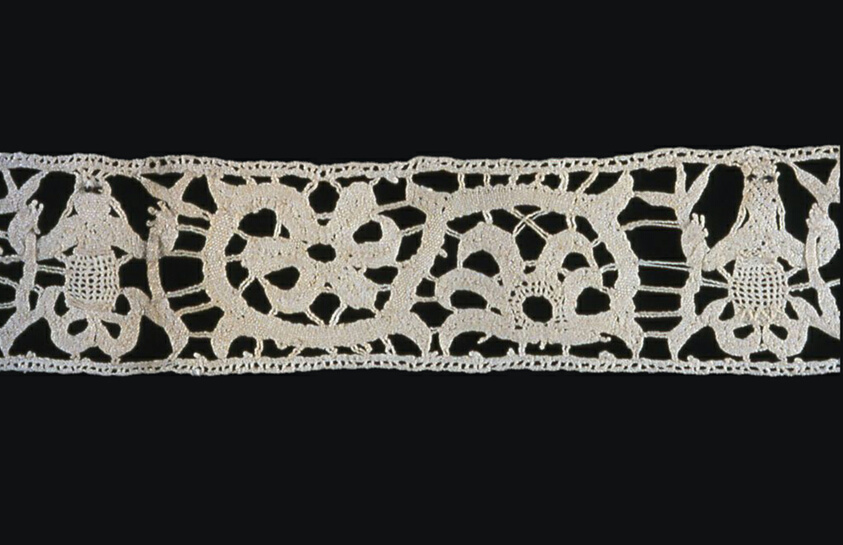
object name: Textile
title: Insertion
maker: Italy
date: c. 1600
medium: Linen, bobbin part lace; glass beads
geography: Italy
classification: textile; lace - bobbin